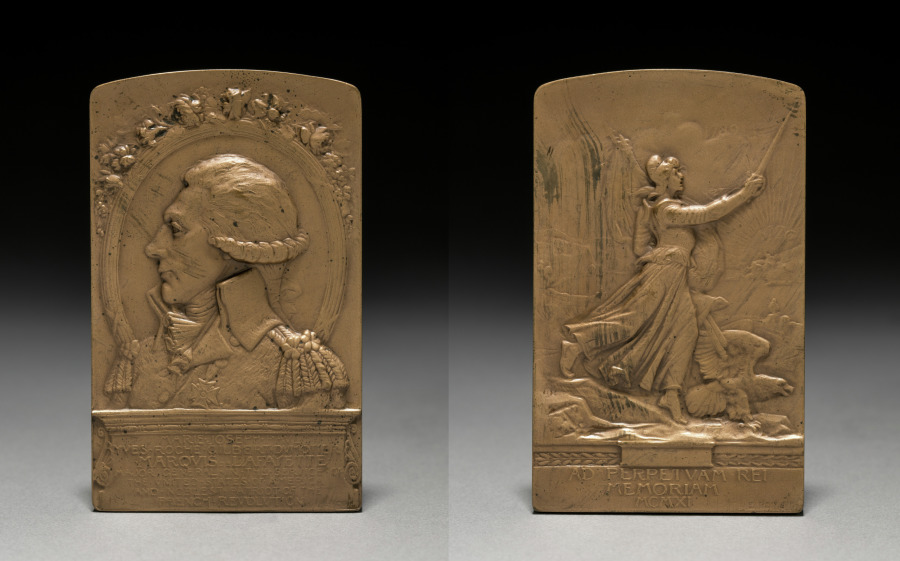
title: Medal: Lafayette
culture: France, 20th century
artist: Jules Edouard Roiné (French, 1857–1916)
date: 1911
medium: bronze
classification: Metalwork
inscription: below: "MARIE JOSEPH PAUL/ YVES. ROCHE. GILBERT. DVMOTIER/ MARQVIS DE LAFAYETTE/ MAJOR GENERAL IN THE SERVICE OF/ THE VNITED STATES OF AMERICA/ AND NOBLEST PATRIOT OF THE/ FRENCH REVOLVTION."